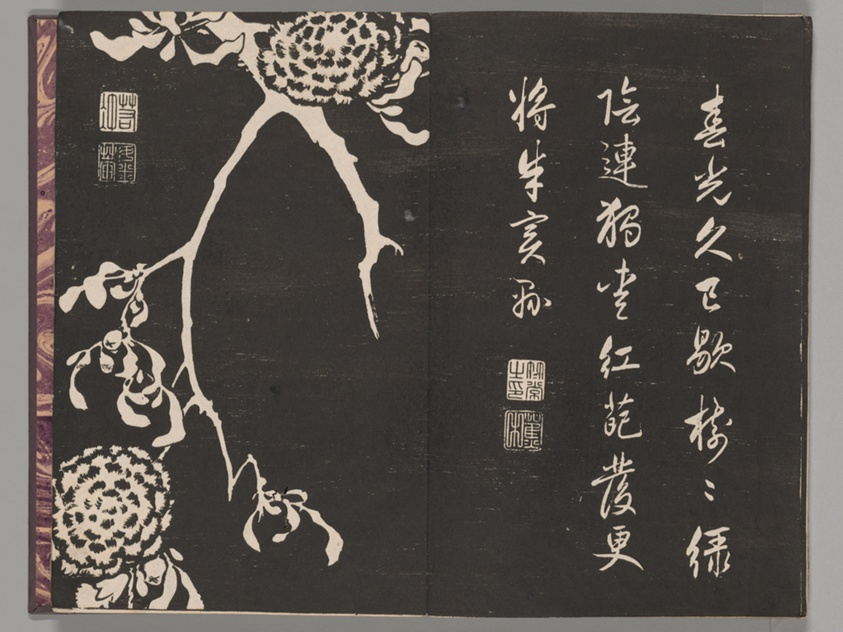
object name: Book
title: Soken sekisatsu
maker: Ito Jakuchu (Japanese, 1716-1800)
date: 1767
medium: Woodblock printed book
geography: Japan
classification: book